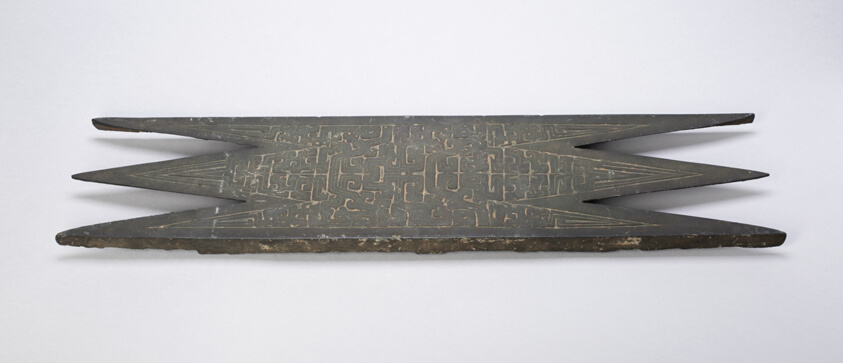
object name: Architectural fragment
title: Architectural Fitting (Gong)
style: Chinese (culture or style)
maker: China, Qishan county, Shaanxi province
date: Eastern Zhou dynasty, Spring and Autumn period (770–481 B.C.), 7th century B.C.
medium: Bronze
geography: China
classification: architectural fragment